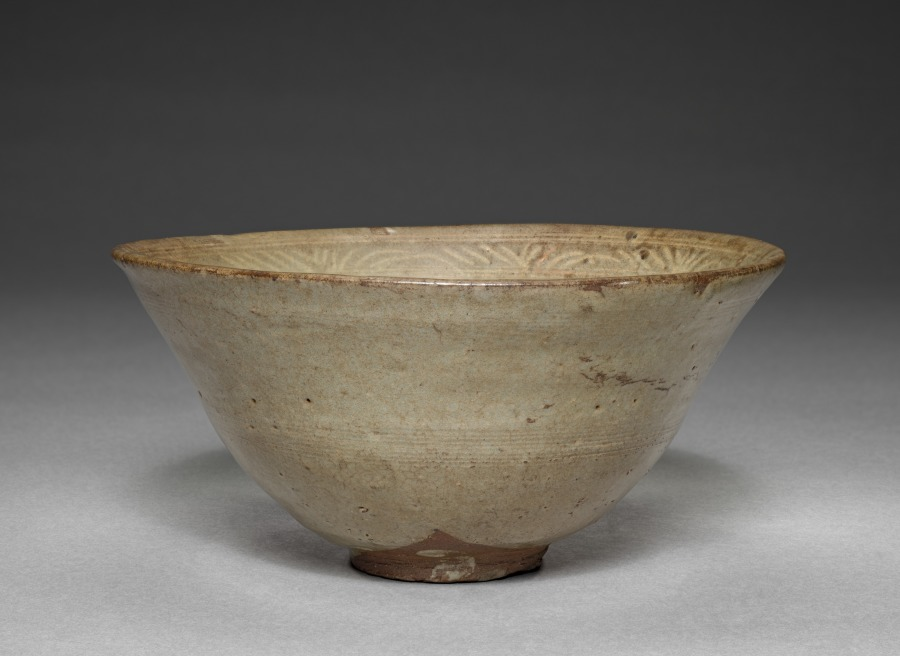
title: Bowl with Stamped Floral Decoration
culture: Korea, Joseon dynasty (1392–1910)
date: 1400s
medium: glazed ceramic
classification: Ceramic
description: This type of wide-mouthed bowl was used every day in Korea, not exclusively for tea drinking. But when it was introduced to Japan around the early 16th century, its imperfect appearance evoking the aesthetics of wabi-sabi caused it to be repurposed as a tea bowl. Korean tea bowls were circulated as an item of foreign luxury among Japanese military elites. Many Korean potters were abducted to japan during the Japanese invasions (1592–98) and some settled down in Japan, particularly in the Saga prefecture in Kyushu. A Japanese tea bowl such as 1983.158 in the CMA collection is one example possibly created by the descendants of dislocated Korean potters.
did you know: This type of humble tea bowl was highly praised among Japanese collectors for its imperfect beauty.